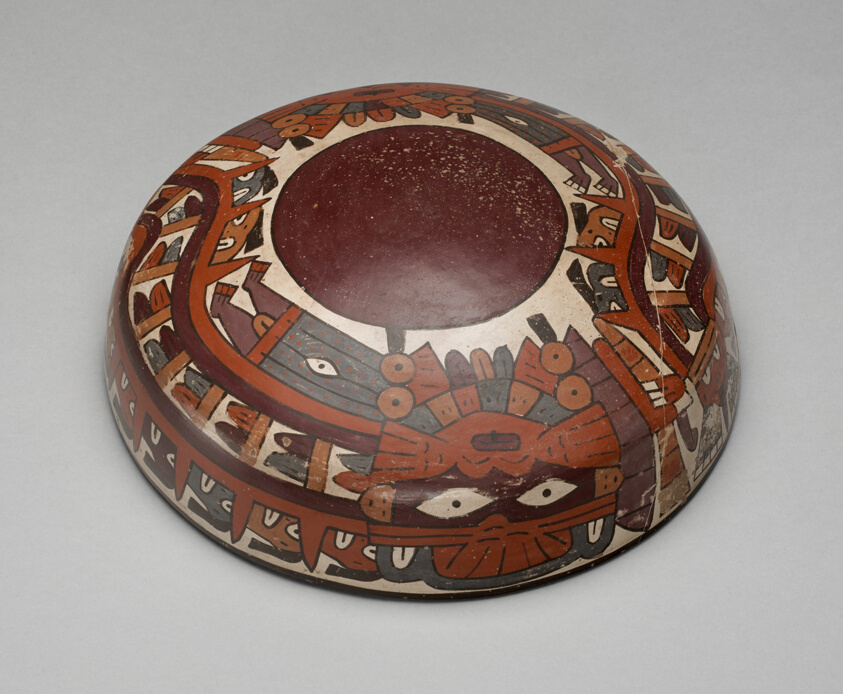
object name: Vessel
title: One of a Pair of Matched Bowls Depicting Costumed Ritual Performers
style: nazca, early intermediate period, Pre-Columbian, americas, andes, Arts of the Americas, andean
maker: Nazca; South coast, Peru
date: 180 BCE–500 CE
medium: Ceramic and pigment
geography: Peru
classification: bowl; earthenware; art of the americas; ceramics; vessel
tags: abstract figures, agriculture, costumed performer, anthropomorphic figure, ritual performer